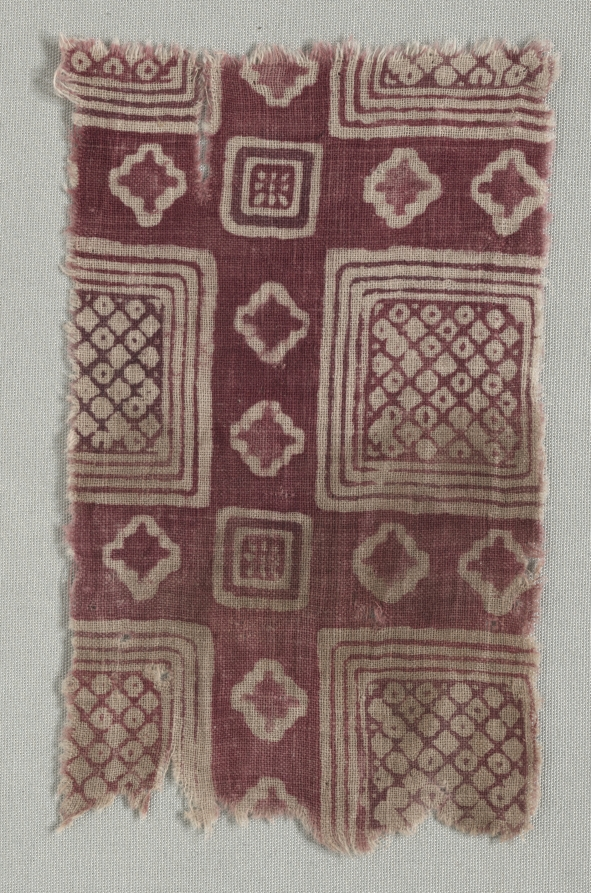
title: Fragment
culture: India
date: 1400s (?)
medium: stamped resist, applied mordant, dyed; cotton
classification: Textile